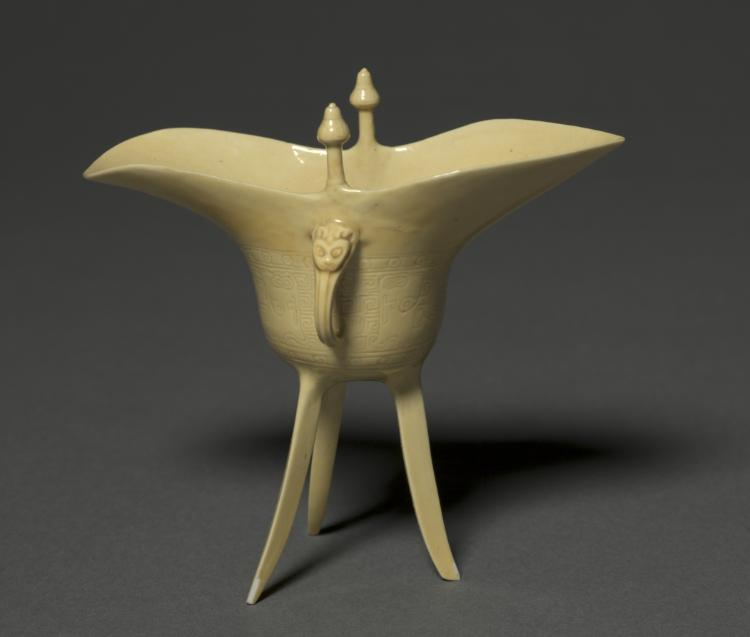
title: Libation Cup in the Form of a Jue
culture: China, Jiangxi province, Jingdezhen, Qing dynasty (1644-1911), Kangxi period (1662-1722)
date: 1662–1722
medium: porcelain with incised and applied decoration and yellow glaze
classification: Ceramic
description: A jue is an ancient Chinese vessel originally designed for serving wine during ceremonies. Bronze jue became prominent during the Shang (c. 1500–1050 BCE) and Zhou (1050–221 BCE) dynasties. This particular piece, made of porcelain during the Qing dynasty (1644–1911), emulates the earlier bronze designs. It reflects the owner's taste for antiquity.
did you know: The handle is decorated with a dragon mask, while the body has a fret pattern in the incised underglaze.